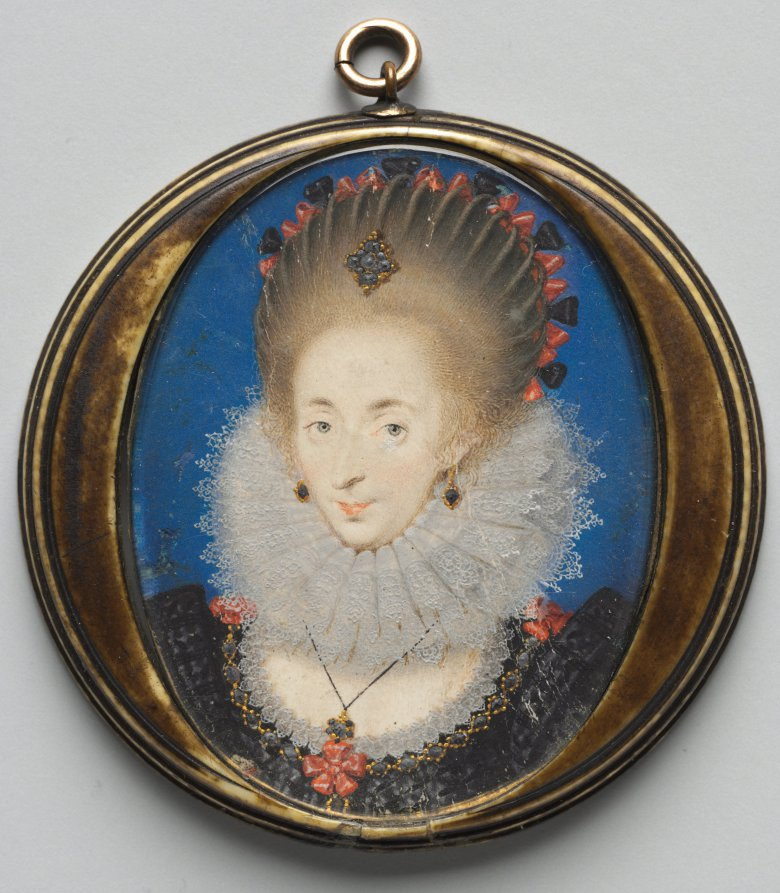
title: Portrait of Lucy Russell, Countess of Bedford, née Harrington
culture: England, 17th century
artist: studio of Isaac Oliver (French, c. 1565–1617)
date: 1612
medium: watercolor on vellum with gold and silver in original stained ivory case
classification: Portrait Miniature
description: Although the identity of the lady is uncertain, she must have been a wealthy woman, judging by her heavy and elaborate jewelry, complete with necklace, chain, earrings, jewel-encrusted dress and a kind of aigrette in her hair. In an age when clothes were assumed to be an accurate indicator of status, it was judged essential to wear your wealth, especially when immortalized in a portrait. Oliver painted the woman's pearl earrings using Nicholas Hilliard's jewelling technique, which involved laying a raised blob of white lead paint with some shadowing to one side. This form was then crowned with a rounded touch of real silver that was burnished with, to quote Hilliard, "a pretty little tooth of some ferret or stoat or other wild little beast." This technique brought the silver to a sparkling highlight, while actual gold is used to paint the pearl's gold setting. Silver tarnishes with age, therefore, the pearl earrings now appear black.